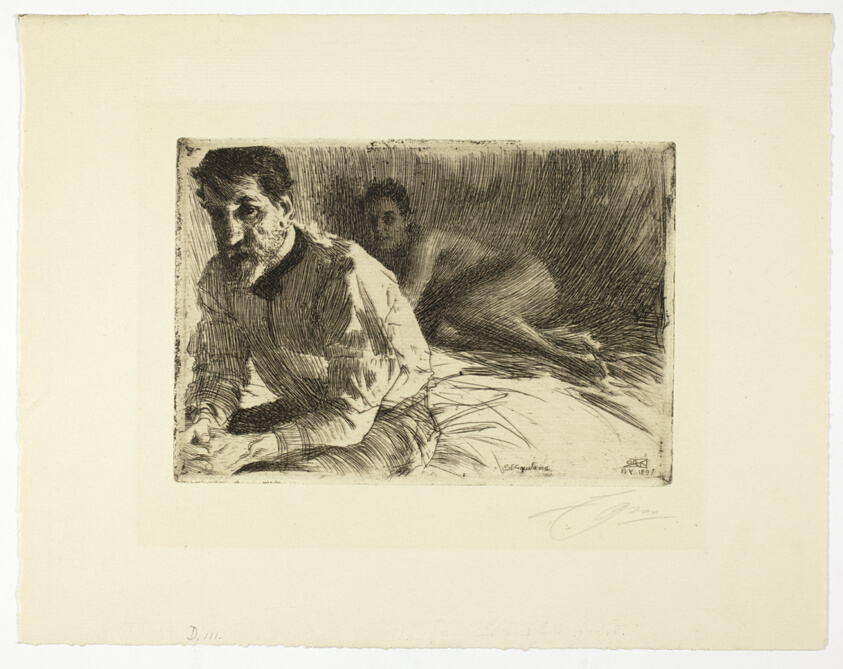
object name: Print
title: Augustus Saint Gaudens II (Saint Gaudens and His Model)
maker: Anders Zorn (Swedish, 1860-1920)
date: 1897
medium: Etching in black on ivory laid paper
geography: Sweden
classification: etching; paper; print; prints and drawing